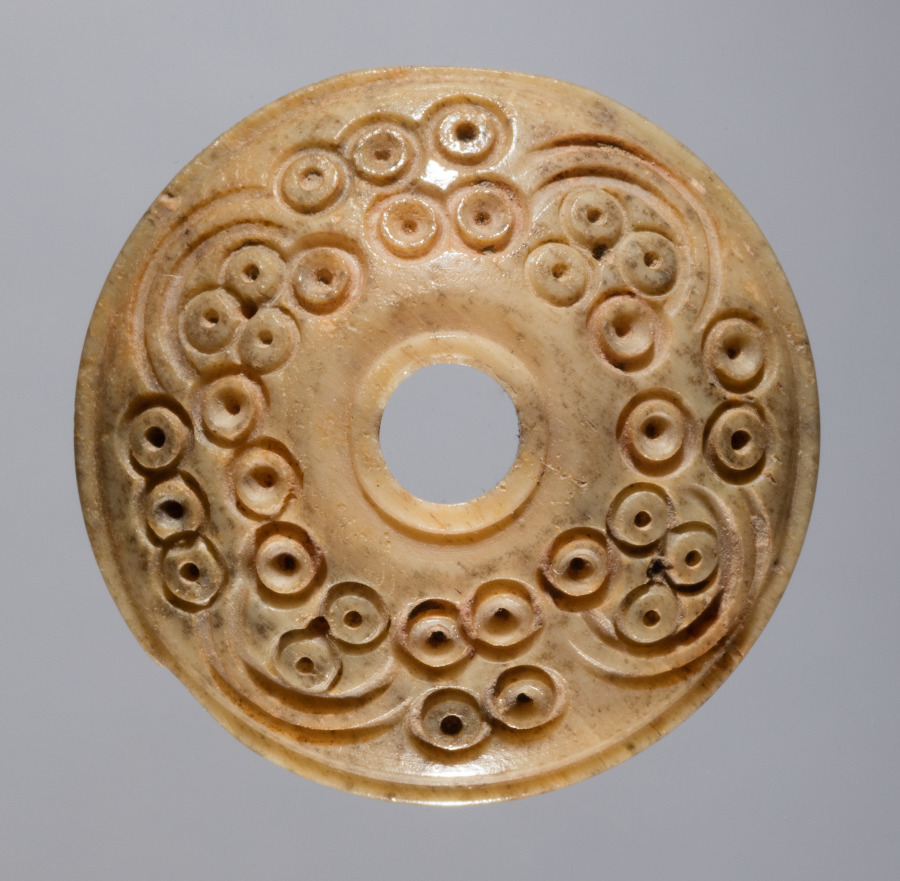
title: Spindle Whorl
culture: Iran, early Islamic period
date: 700s - 900s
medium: bone, incised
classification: Spindle Whorl